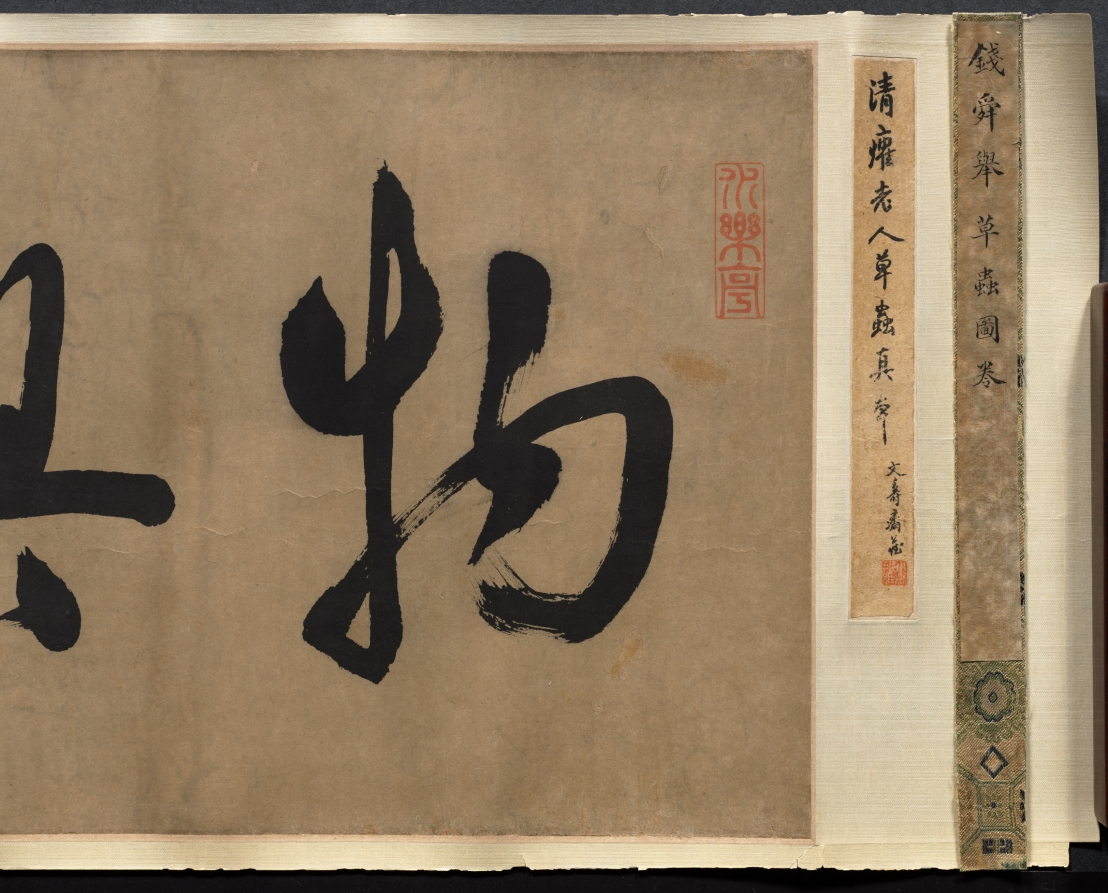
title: Insects and Flowers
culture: China, Qing dynasty (1644-1911) or Republican period (1912-49)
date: c. 1900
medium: Handscroll, ink and color on paper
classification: Painting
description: More than 26 feet long, this scroll presents insects, reptiles, and plants in delicate brushwork and pale colors, referring in style to earlier Southern Song dynasty (1127–1279) bird-and-flower paintings. Upon closer inspection, ants dismember a butterfly and reptiles wait to ambush their prey. An inscription at the end of the painting gives us an idea of its meaning: Attributed to the Qing dynasty scholar Zhang Xigeng (張錫庚, 1801–1861), the inscriber relates the work to an earlier painting by Qian Xuan (錢選, c. 1235–before 1307) and further suggests that the painting may allude to the relentlessness of natural selection. By drawing a parallel to tumultuous episodes in Chinese history, the writer might even hint at the domestic rebellions and the aggression of Western powers against China in his lifetime, particularly the Opium Wars (1839–60).